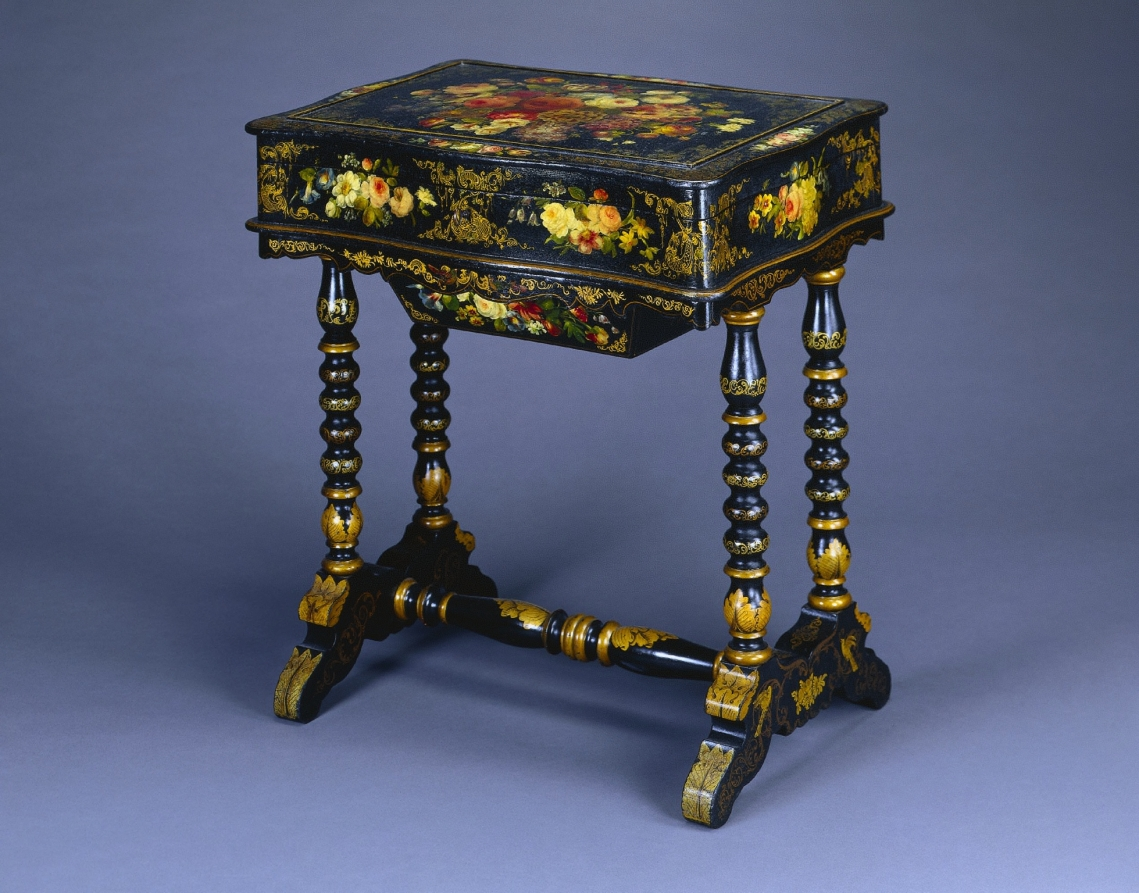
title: Work Table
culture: America, Pennsylvania, Philadelphia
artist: attributed to Hart, Ware and Co. (American)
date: c. 1850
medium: wood with painted decoration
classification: Furniture and woodwork